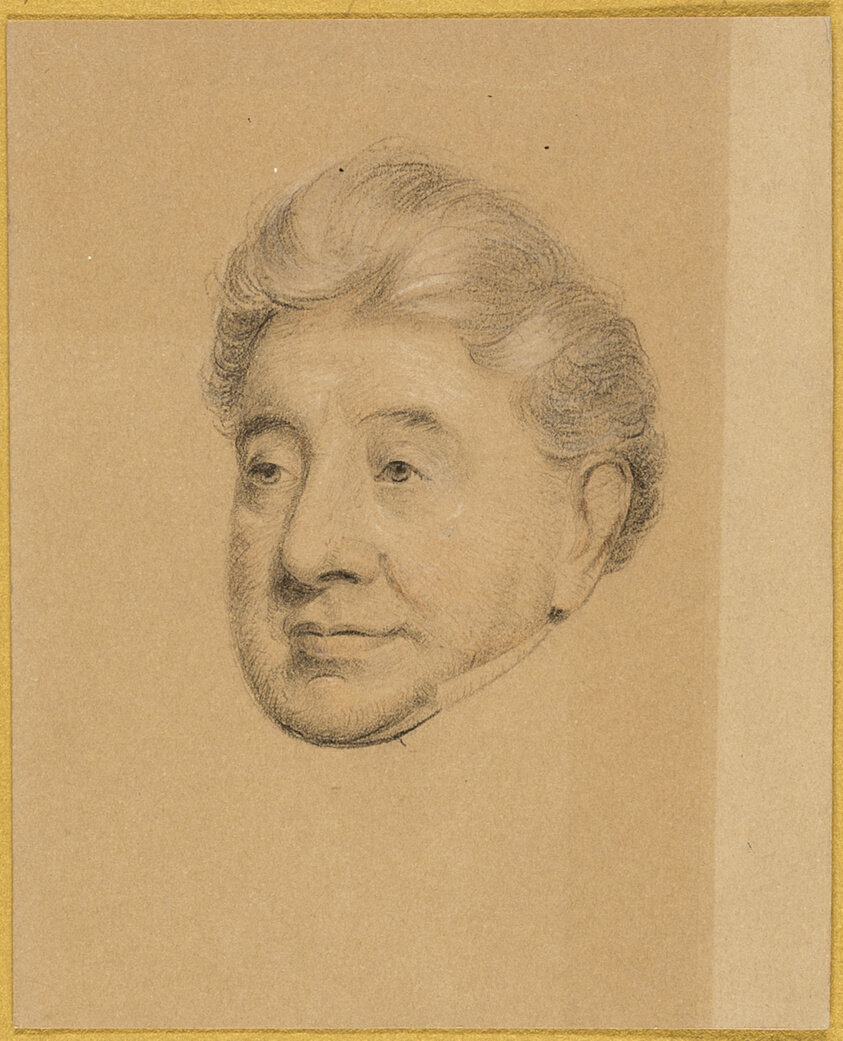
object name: Drawing and Watercolor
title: Portrait of George IV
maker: Attributed to William Mulready; English, born Ireland, 1786-1863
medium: Black crayon, heightened with red and white crayon, on brown wove paper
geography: United Kingdom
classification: crayon; drawings (visual works); prints and drawing